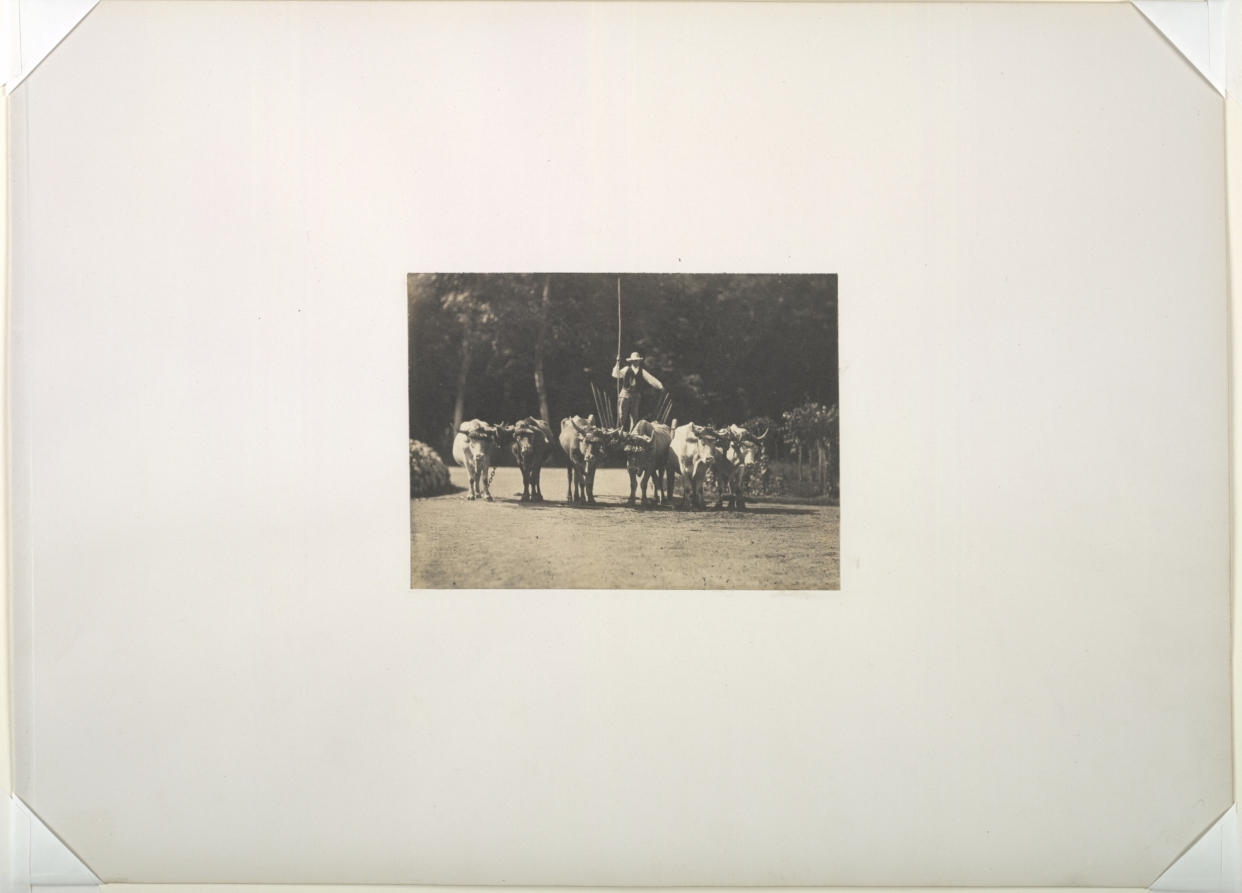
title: Six Oxen Team with their Driver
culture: France, 19th century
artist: Olympe Aguado (French, 1827–1894)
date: c. 1853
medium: salt print from wet collodion negative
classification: Photograph